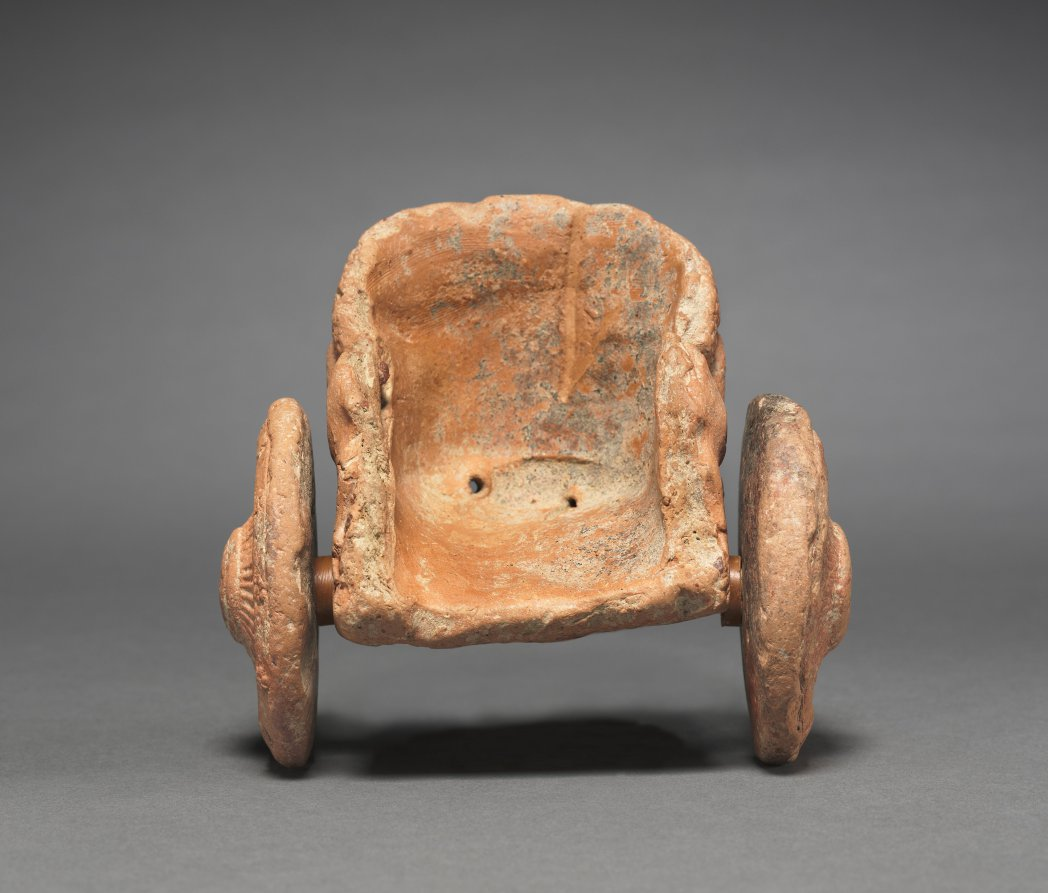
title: Model Chariot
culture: India, Shunga period (185–78 BCE)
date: 200s–100s BCE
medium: terracotta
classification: Sculpture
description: This terracotta chariot may have held a figurine of a hero or divinity for use on a domestic altar or as a toy. The two-wheeled conveyance is decorated with rows of flowers and bells. A charioteer and two horses, now indistinct, appear to have been carved onto the front.